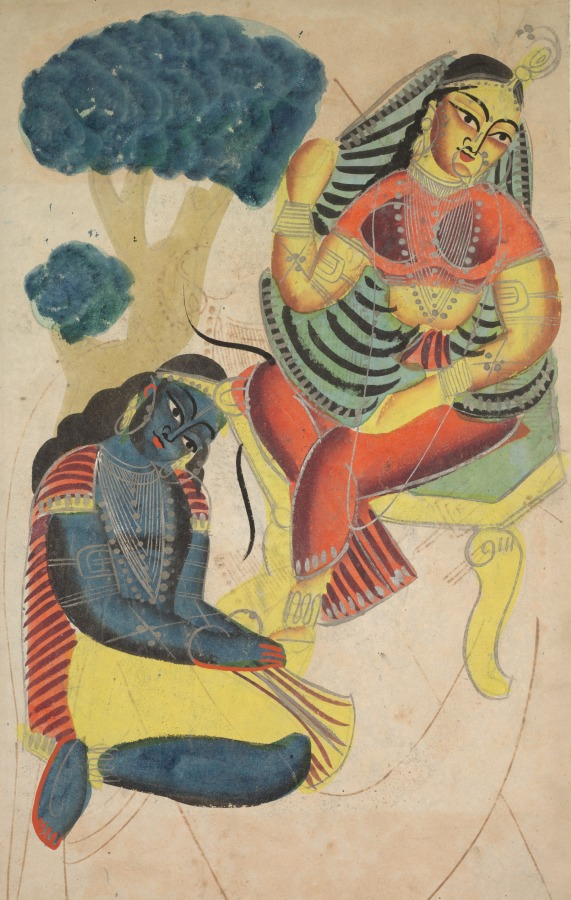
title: Krishna Stroking Radha's Feet (verso), from a Kalighat album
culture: Eastern India, Bengal, Kolkata, Kalighat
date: c. 1890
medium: Gum tempera, graphite, and ink on paper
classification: Painting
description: Appeased by Krishna’s flattery, Radha sits in a chair coyly holding the cloth covering her head. According to popular stories about the couple, Radha often experiences longing for him while they are separated and jealousy for his love affairs with other cowgirls (gopis). Here Krishna is imploring her to forgive him for his transgressions.